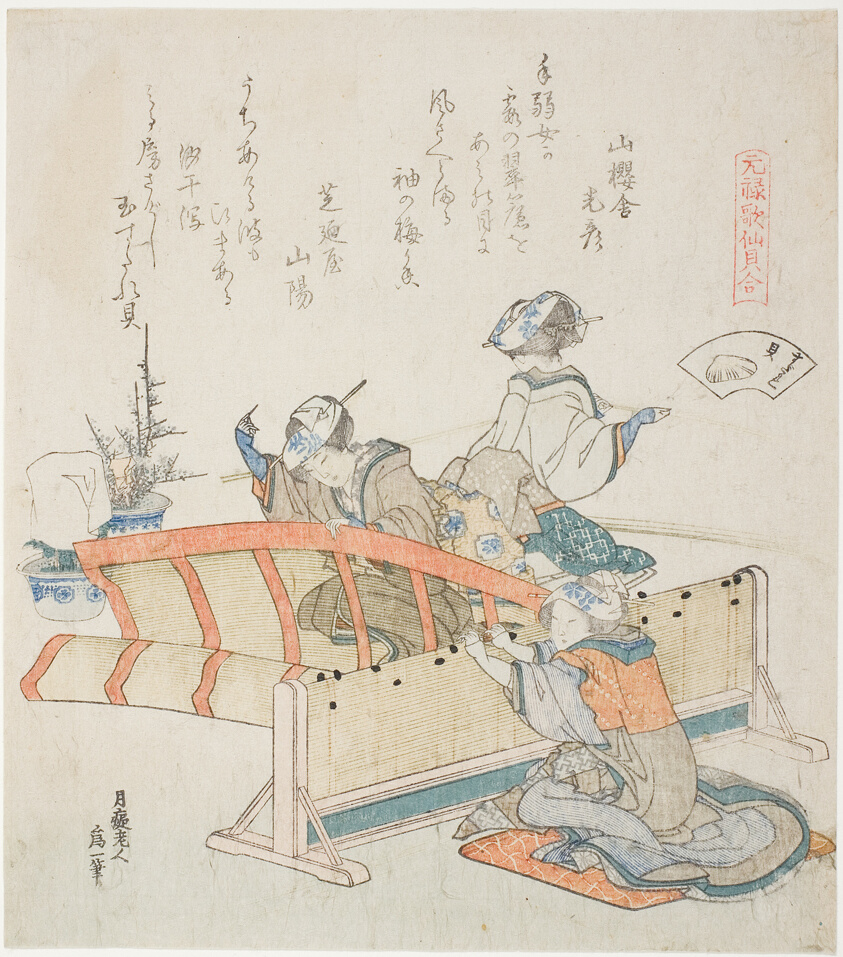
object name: Print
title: Making Bamboo Blinds, illustration for The Bamboo-Blind Shell (Sudare-gai), from the series "A Matching Game with Genroku-period Poem Shells (Genroku kasen kai awase)"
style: Japanese (culture or style)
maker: Katsushika Hokusai 葛飾 北斎; Japanese, 1760–1849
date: 1821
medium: Color woodblock print with metallic pigments and blindprinting (as a result of forgetting to ink the group of extra slats of bamboo); surimono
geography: Japan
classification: woodblock print; print; asian art